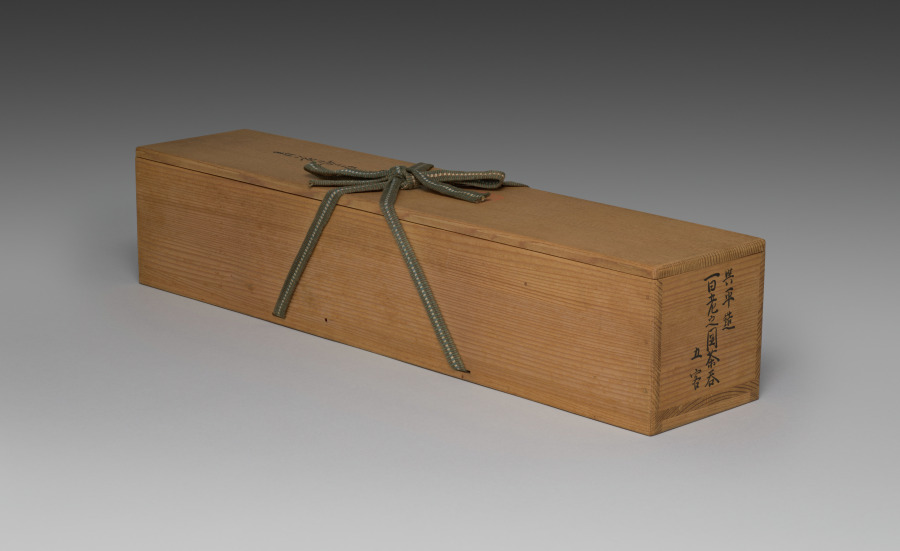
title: Teacups with a Hundred Sages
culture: Japan, Meiji period (1868–1912)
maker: Seifū Yohei III (Japanese, 1851–1914)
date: 1893–1914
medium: Set of five teacups; porcelain with underglaze blue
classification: Ceramic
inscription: 清風造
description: Each of these five teacups has a painting of identical design in underglaze blue, but as the tiny figures are drawn entirely by hand, each cup has its own personality. The theme of the sencha cups is an assembly of sages or immortals, literally “a hundred venerable [people]” (hyakurō). The myriad figures crowd the scene in groups. The god of longevity, with his tall forehead, sits with his cranes, having flown in from Mt. Penglai on the Isle of the Immortals. Seven long-bearded sages sit around a stone table, chatting and drinking; one is seated on an enormous gourd. Of course, there is a stack of books on the table, and elsewhere, scrolls are being written upon or read—in one case held very close by a sage who is wearing glasses. The design was enormously popular in ceramics made for those engaged in literati culture.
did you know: Seifū Yohei III (1851–1914) produced many works for tea gatherings where people drank Chinese-style leaf-tea (sencha).